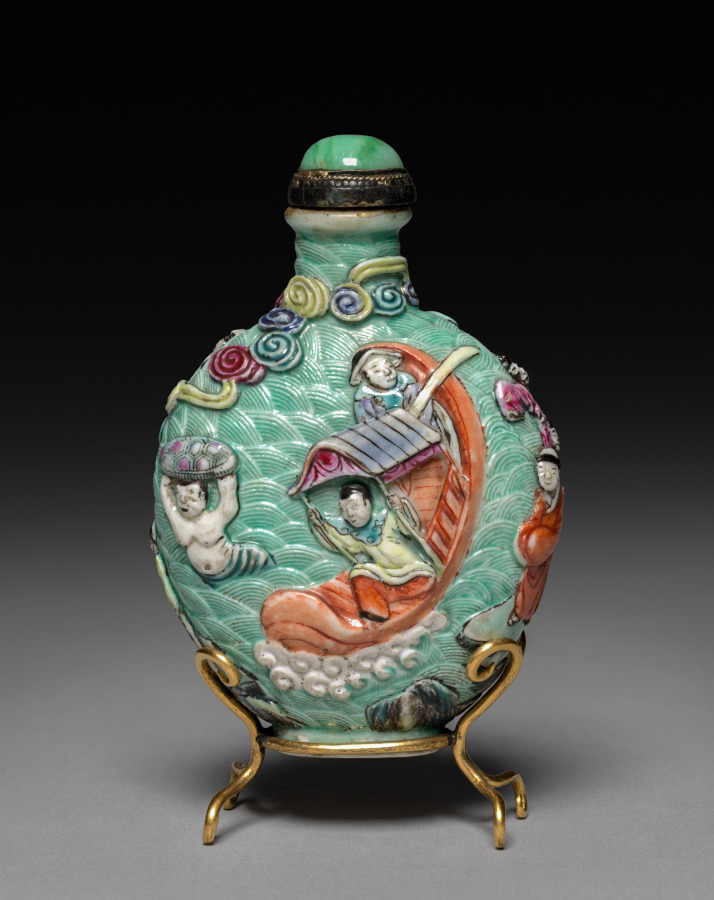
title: Flattened Ovoid Snuff Bottle with Stopper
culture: China, Qing dynasty (1644-1911), Jiaqing reign (1796-1820)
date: 1796–1820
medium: porcelain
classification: Ceramic